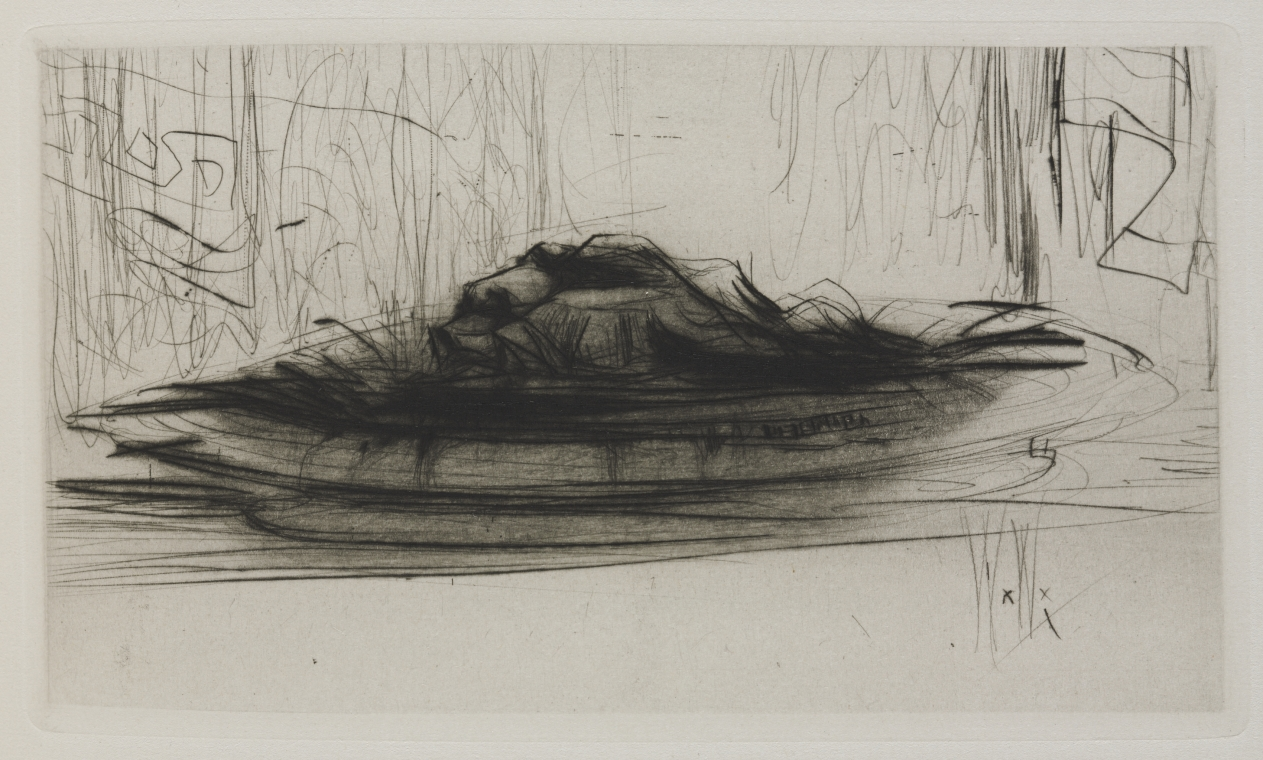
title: Herodias: Page 55, Cul-de-lampe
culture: England, 20th century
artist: William Walcot (British, 1874–1943)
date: 1928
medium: etching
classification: Print